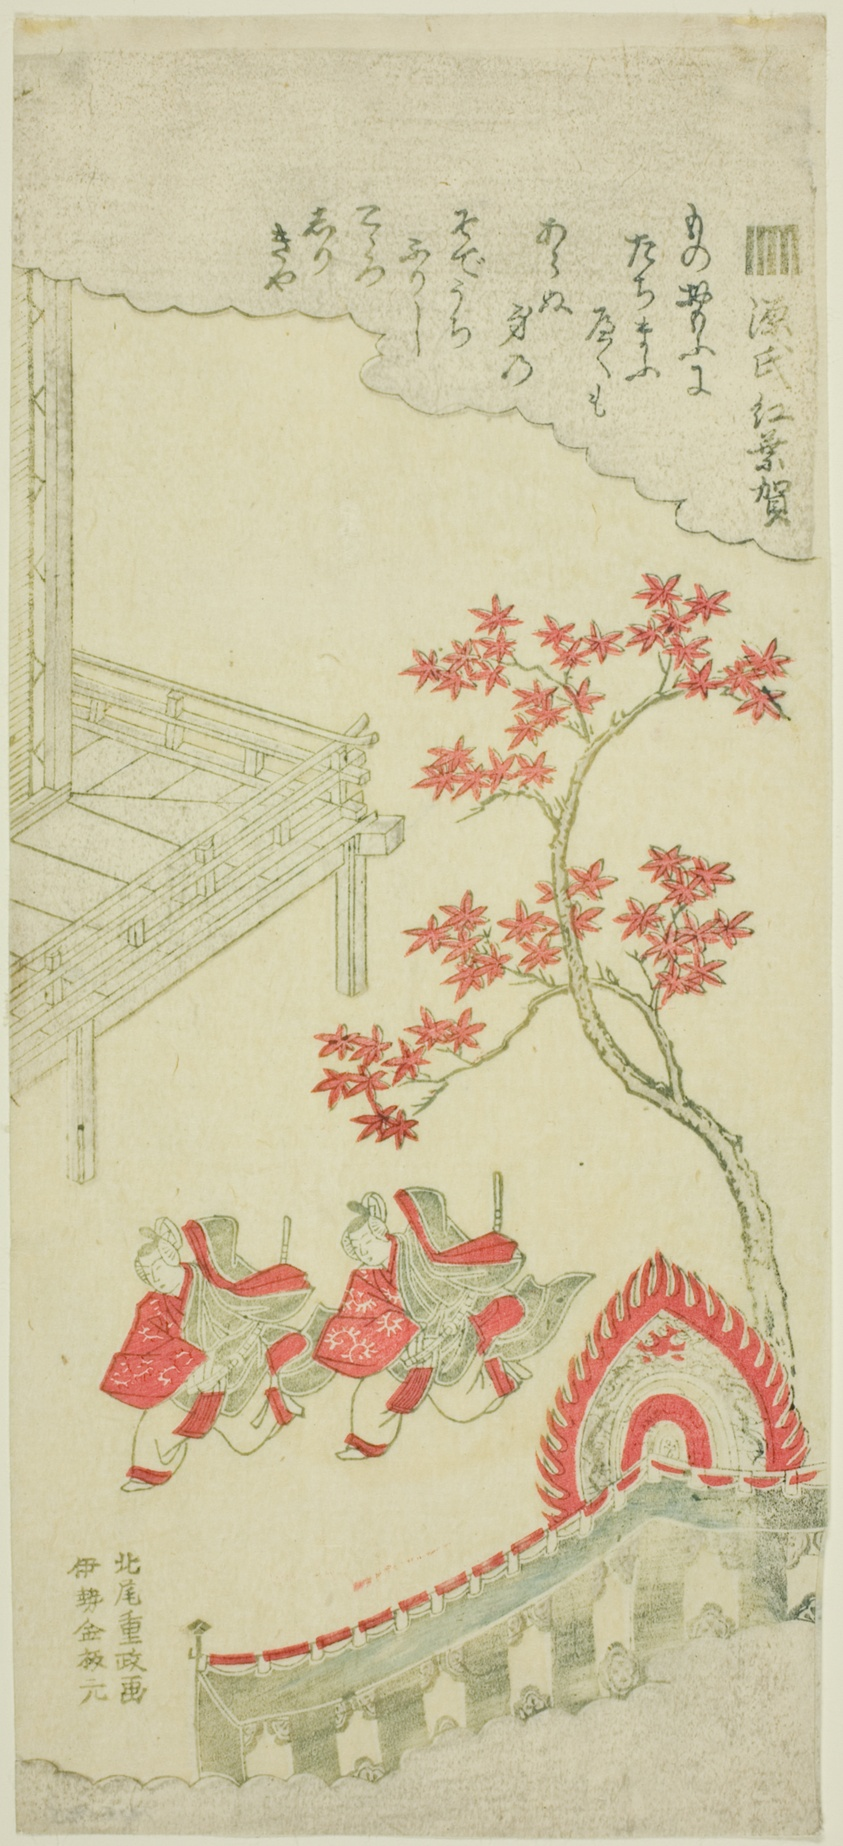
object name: Print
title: The Maple Festival (Momiji no ga) from chapter 7 of The Tale of Genji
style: Japanese (culture or style)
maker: Kitao Shigemasa (Japanese, 1739-1820)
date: early 1760s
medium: Color woodblock print; hosoban, mizu-e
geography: Japan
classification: woodblock print; print; asian art